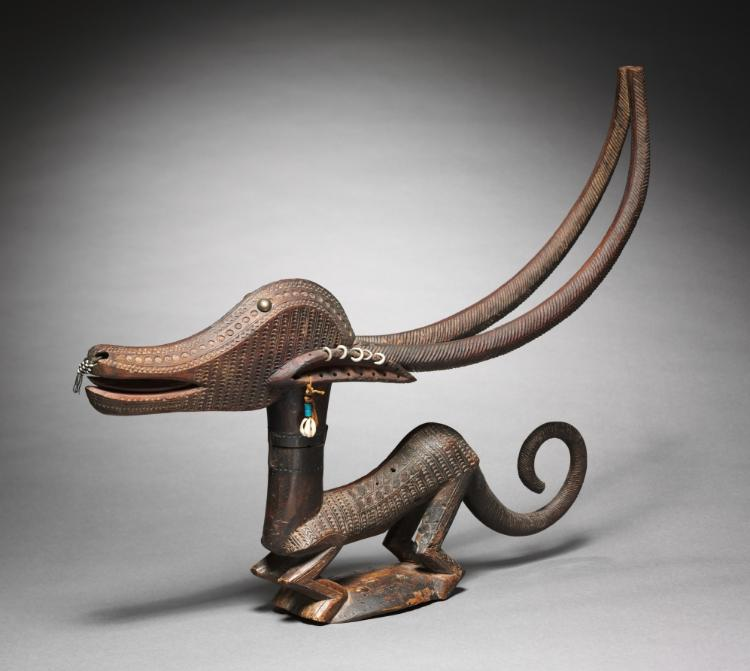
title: Headdress (chi wara)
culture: Africa, West Africa, Mali, Bamana-style blacksmith-carver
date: early to mid-1900s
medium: Wood, cowrie shells, glass beads, possibly aluminum, iron alloy, upholstery studs, and natural fibers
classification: Mask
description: Chi wara—a mythical “farming beast”—was said to teach farming to the Bamana people. Carved patterns cover this female chi wara’s body, highlighting its muscles and emphasizing that it is no earthly animal, but rather an agricultural spirit that combines human, antelope, and anteater elements. This example wears earrings and a nose ring of imported metals and beads. Its carver—a blacksmith—used a naturalistic style common south of the city of Bamako. Accompanied by women’s songs, male performers danced paired male-and-female chi wara headdresses affixed to basketry caps at agricultural competitions and weddings.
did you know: Chi wara headdresses look different depending on the region they were made in. The style of this example tells us it was likely made in the Djitoumou region of southern Mali.